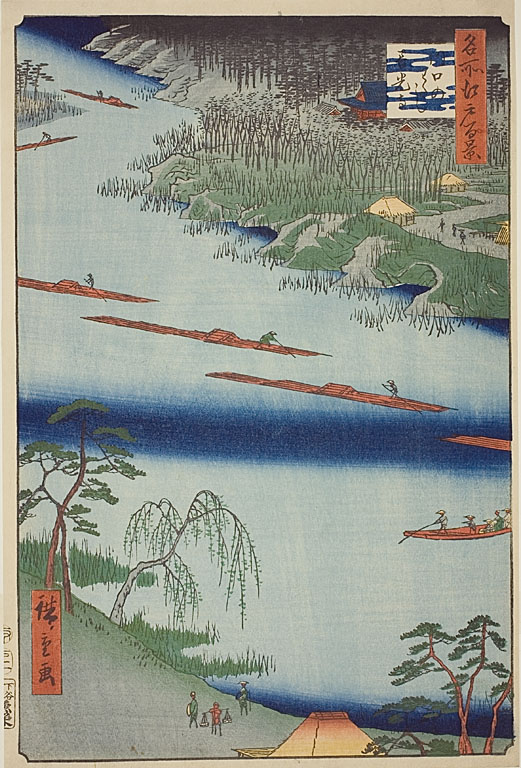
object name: Print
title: Zenkoji Temple and the Ferry at Kawaguchi (Kawaguchi no watashi Zenkoji) with dark blue stripe, No.20 from the series "One Hundred Famous Views of Edo (Meisho Edo hyakkei)"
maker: Utagawa Hiroshige (Japanese, 1797-1858)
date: 1857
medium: Color woodblock print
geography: Japan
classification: woodblock print; print; asian art